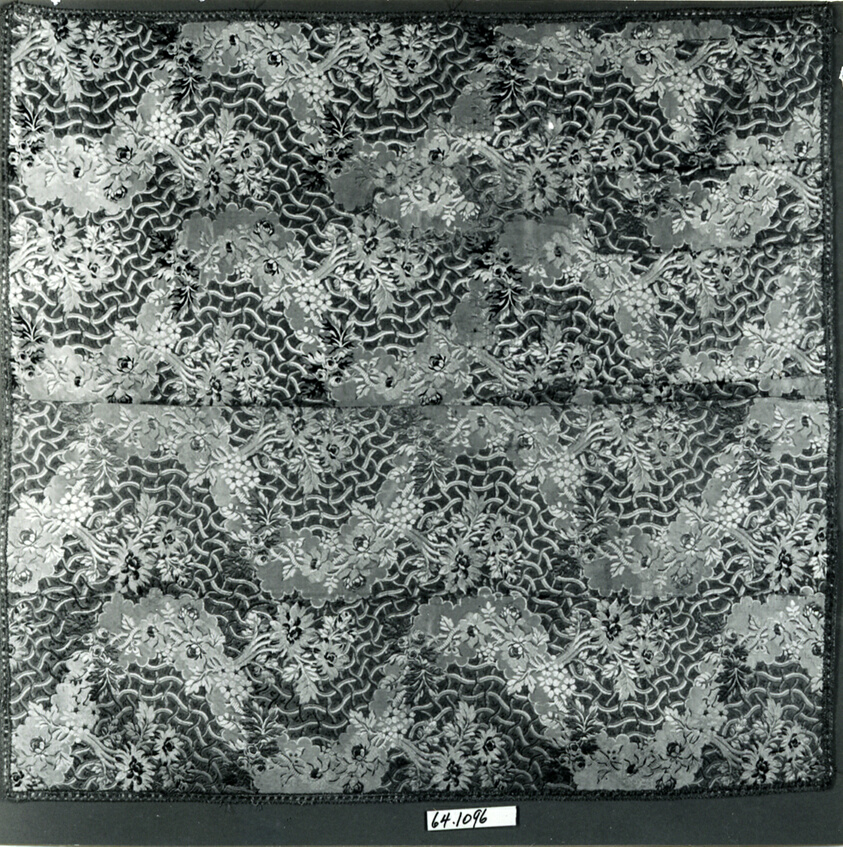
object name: Textile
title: Panel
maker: France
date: Mid–18th century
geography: France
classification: textile; weaving